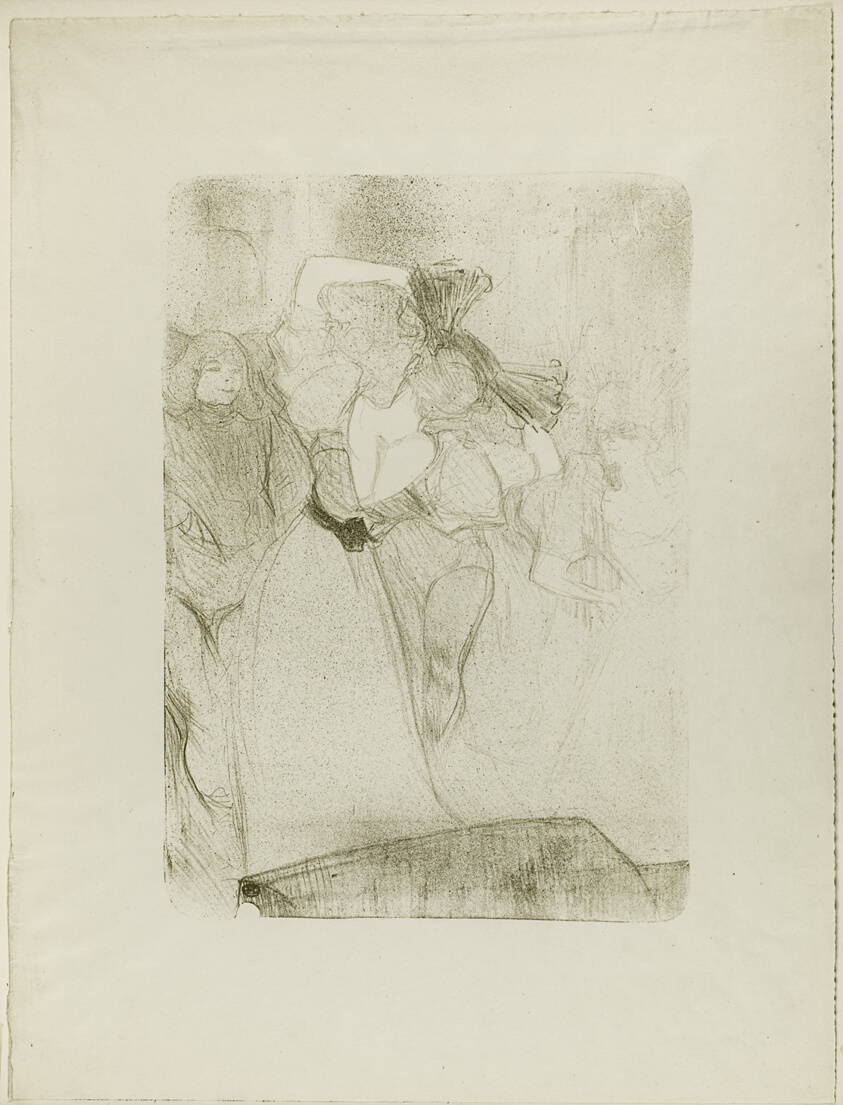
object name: Print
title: Rear View of Lender Dancing the Bolero in Chilpéric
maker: Henri de Toulouse-Lautrec (French, 1864-1901)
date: 1895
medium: Color lithograph on cream wove paper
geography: France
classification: lithograph; print; prints and drawing